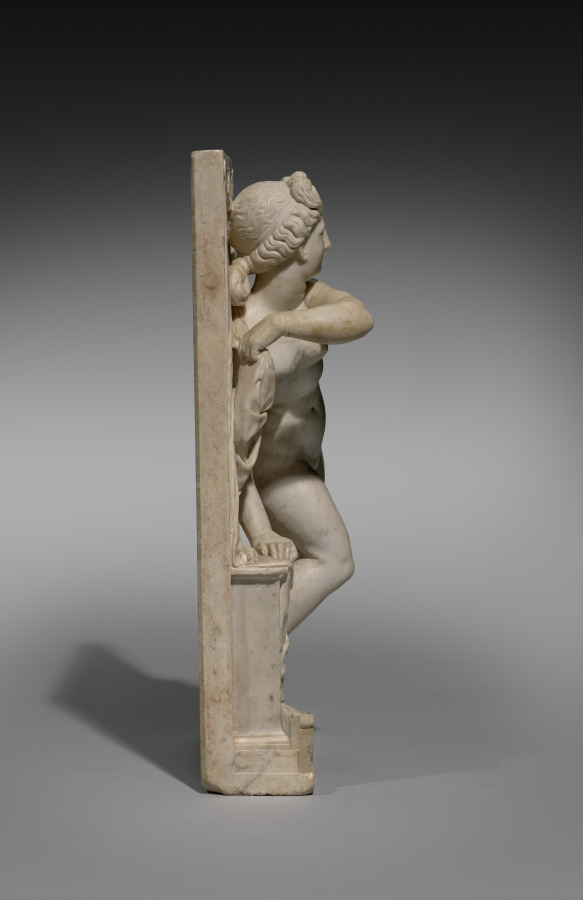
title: Dido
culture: Italy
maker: Aurelio Lombardo (Italian, 1501–1563)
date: c. 1525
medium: marble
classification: Sculpture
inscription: PVNICA SVM [DIDO ERE]XI QVAE MOENIA BYRSA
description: Artists customarily portrayed Dido as a forlorn lover abandoned by the Trojan hero, Aeneas, but here she is a conquering queen. Dido draws aside an oxhide curtain, a reference to the mythical founding of Carthage (in modern-day Tunisia, North Africa), when she was given an oxhide to demarcate granted land. By cutting it into thin strips she was able to encircle the future city. Dido was likely created for display in a studiolo, a place of study featuring refined works of art appreciated by humanist scholars and aficionados during the Renaissance.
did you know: Dido’s nudity and hairstyle are allusions to ancient Greek images of Aphrodite.